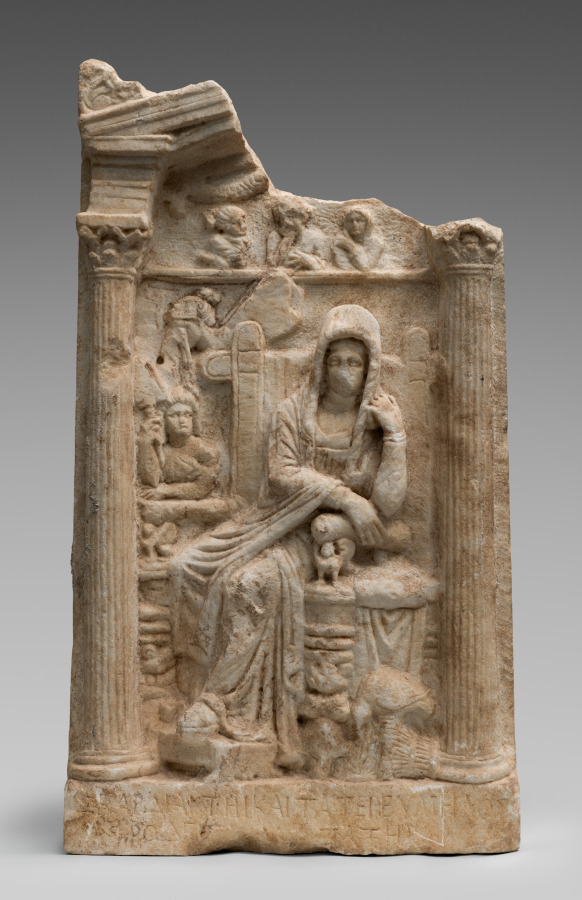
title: Grave Stele (Relief)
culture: Southern Anatolia, Pamphylia, Hellenistic Greek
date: c. 50 BCE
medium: marble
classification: Sculpture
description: The multiple figures, inscription, use of perspective, and architectural frame distinguish this ambitious relief as one of the most important of its type. The Greek inscription on the base reads, “To Sbardia, also named Tate, Eumelos, son of Aphrodisios, her father, [set this up].” The deceased is shown seated on an elaborate chair. A servant girl holding a fan suggests Sbardia’s high social standing. At the bottom right corner, a hen perches on an upturned basket, a symbol of “the good life.” The stele incorporates a “springing” gable supported by engaged half columns with simplified Corinthian capitals. Other features relate to beliefs about mortality and the afterlife. Above and to the left of her chair is her winged psyche (soul) shown leaving her body. Figures of the three fates are shown in the pediment above, reminding us that human life is finite.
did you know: The seated woman is depicted larger to visually emphasize her importance; her servant is in the background.